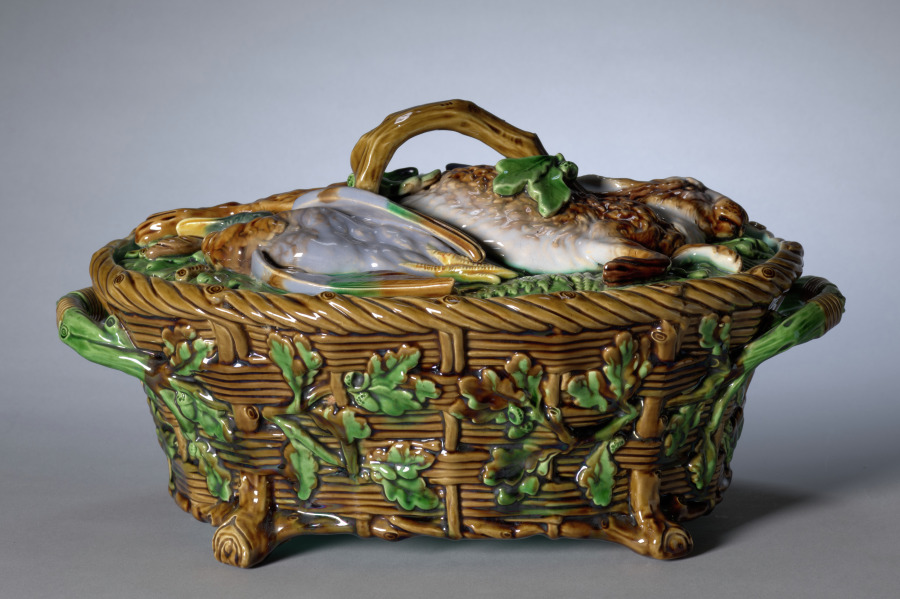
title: Game Pie Dish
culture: England, 19th century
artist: Minton Pottery and Porcelain Factory (British)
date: c. 1860–80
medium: earthenware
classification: Ceramic